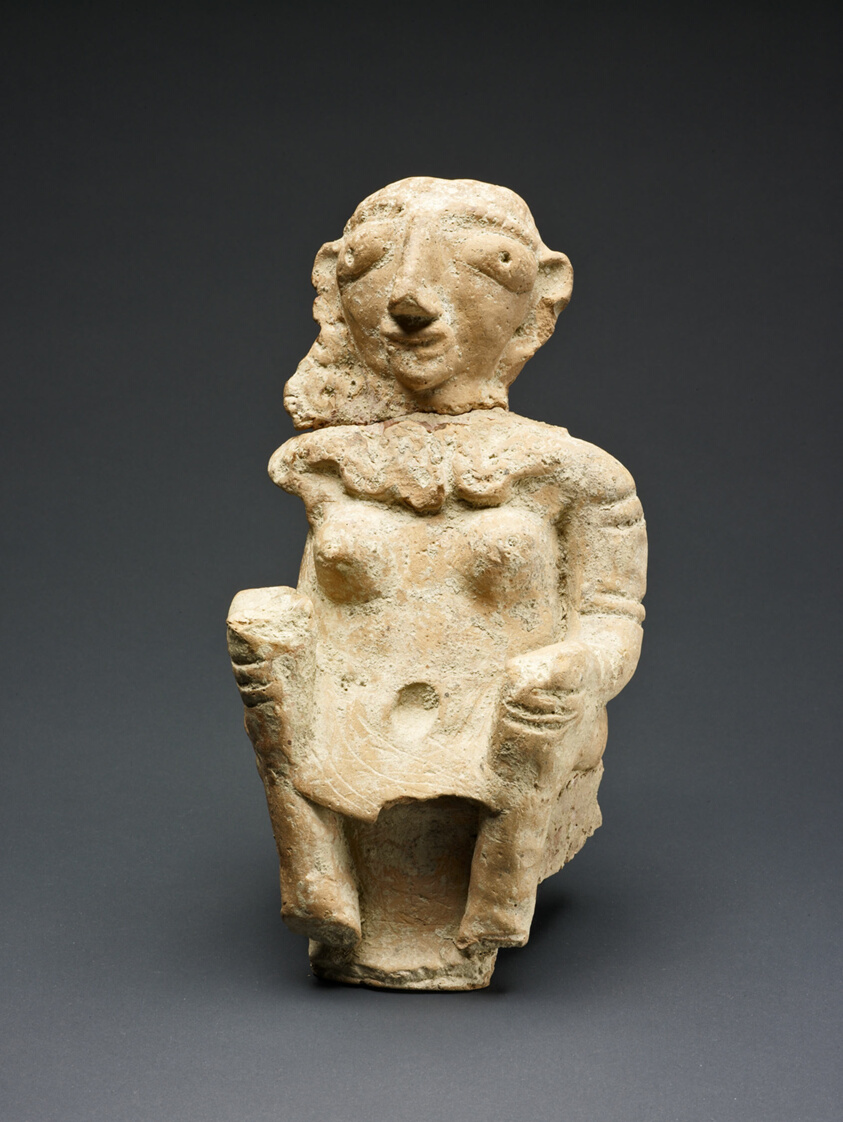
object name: Sculpture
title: Seated Mother Goddess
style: South Asian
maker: India; Uttar Pradesh, possibly Ahichchattra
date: 1st century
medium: Hand-modeled terracotta with red slip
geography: Uttar Pradesh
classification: earthenware; ceramics; sculpture; asian art